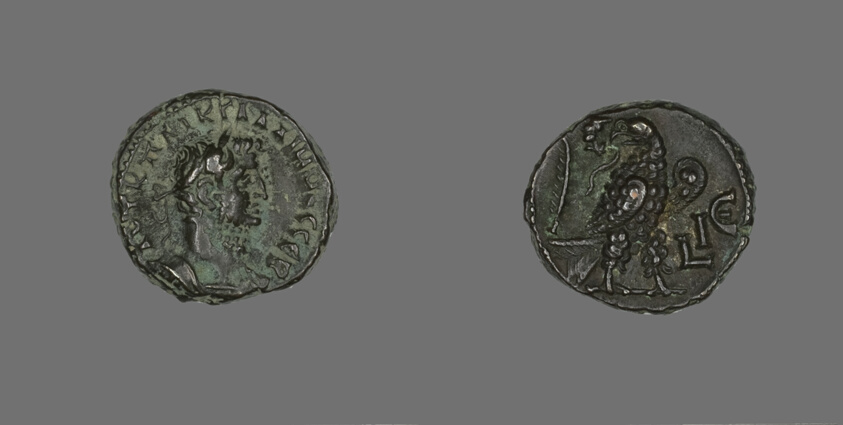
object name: Coin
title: Tetradrachm (Coin) Portraying Emperor Gallienus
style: roman (ancient, style or period), ancient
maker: Roman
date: 267-268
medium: Billon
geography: Roman Empire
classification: coin; ancient art